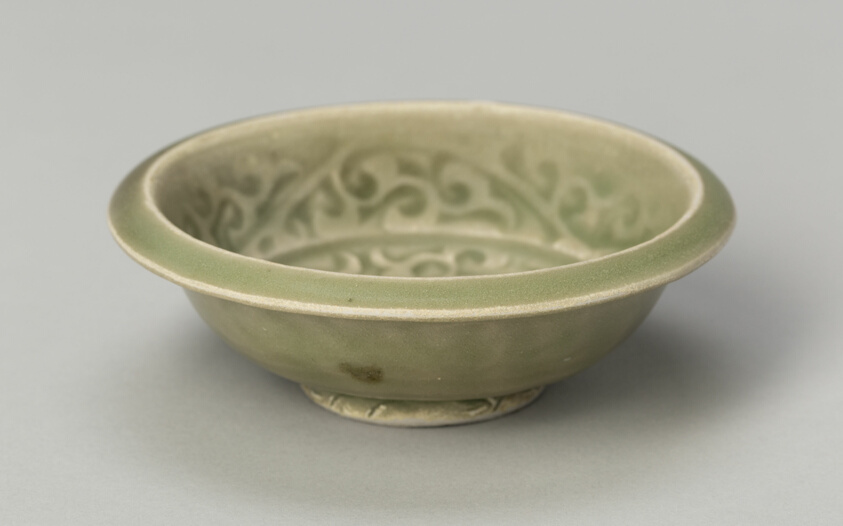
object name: Decorative Arts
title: Basin with Stylized Flowers and Sickle-leaf Scrolls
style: Chinese (culture or style)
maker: China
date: Southern Song (1127–1279) or Yuan dynasty (1271–1368), c. 13th/14th century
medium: Yaozhou ware; glazed stoneware with underglaze molded floral scroll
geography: China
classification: ceramics; decorative arts